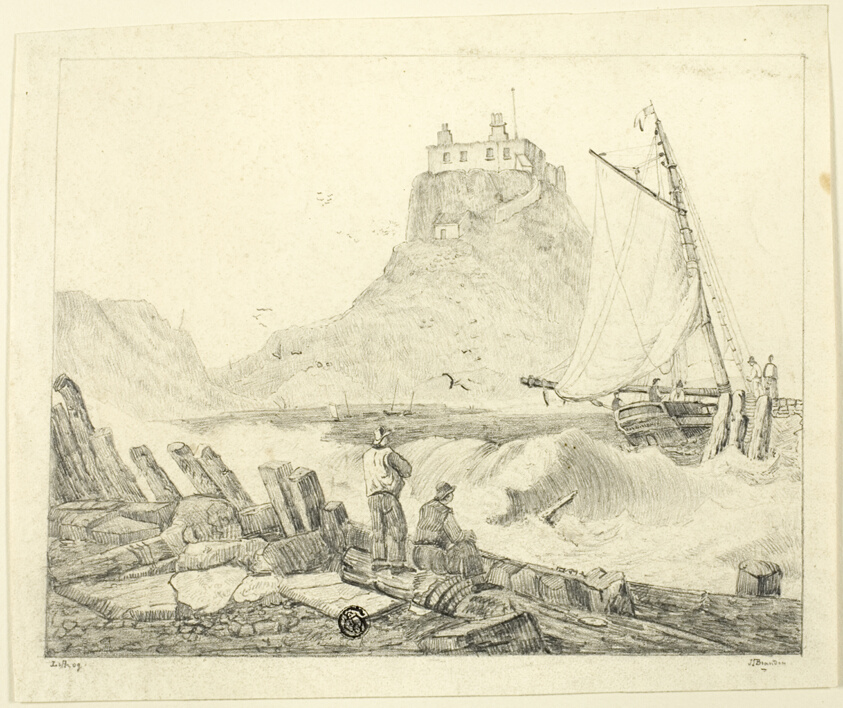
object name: Drawing and Watercolor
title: Harbor with Old Castle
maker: Unknown Artist; United Kingdom, n.d.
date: c. 1820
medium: Graphite on ivory wove paper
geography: England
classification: graphite; drawings (visual works); prints and drawing